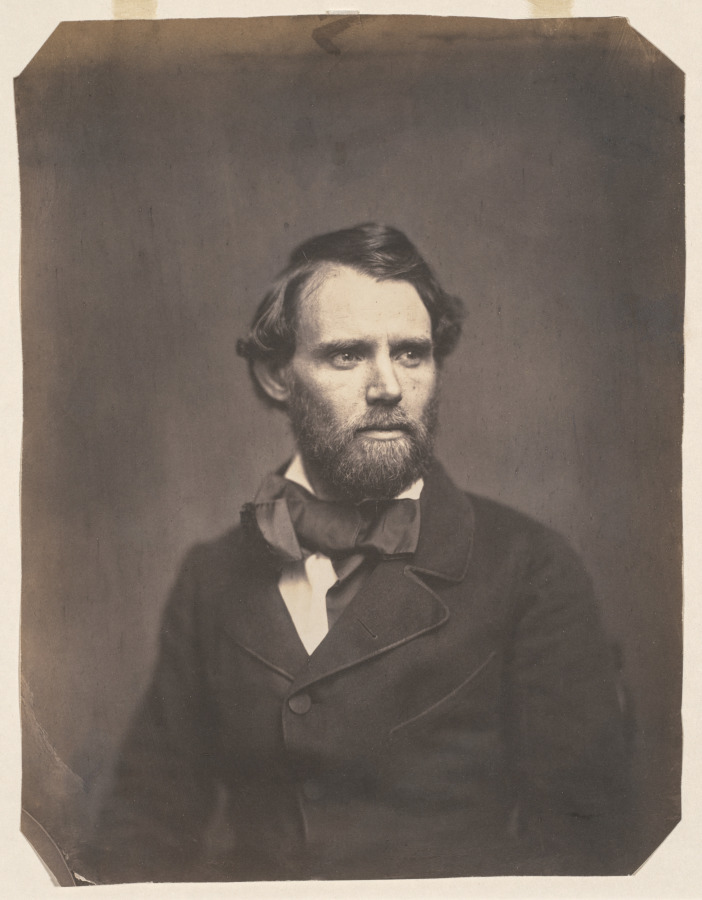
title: Senator George Ellis Pugh of Ohio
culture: America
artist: attributed to Whitehurst Studio (American)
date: c.1857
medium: salted paper print from wet collodion negative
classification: Photograph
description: Photographing prominent politicians or other celebrities was an effective advertisement for the quality and prestige of a portrait studio. Whitehurst Studio opened in 1849 and soon had galleries in 12 cities, including Cincinnati, producing 30,000 daguerreotypes a year. In 1857 its Washington branch advertised it had photographed the entire Congress. To outflank competition from cheaper operators, Whitehurst, in1854, became a pioneer in America in the production of paper photographs. This is a rare example of an American salted paper print, one of the early paper print processes quickly succeeded by albumen prints. Pugh, a Cincinnati lawyer, represented Ohio in the US Senate from 1855 to 1861.